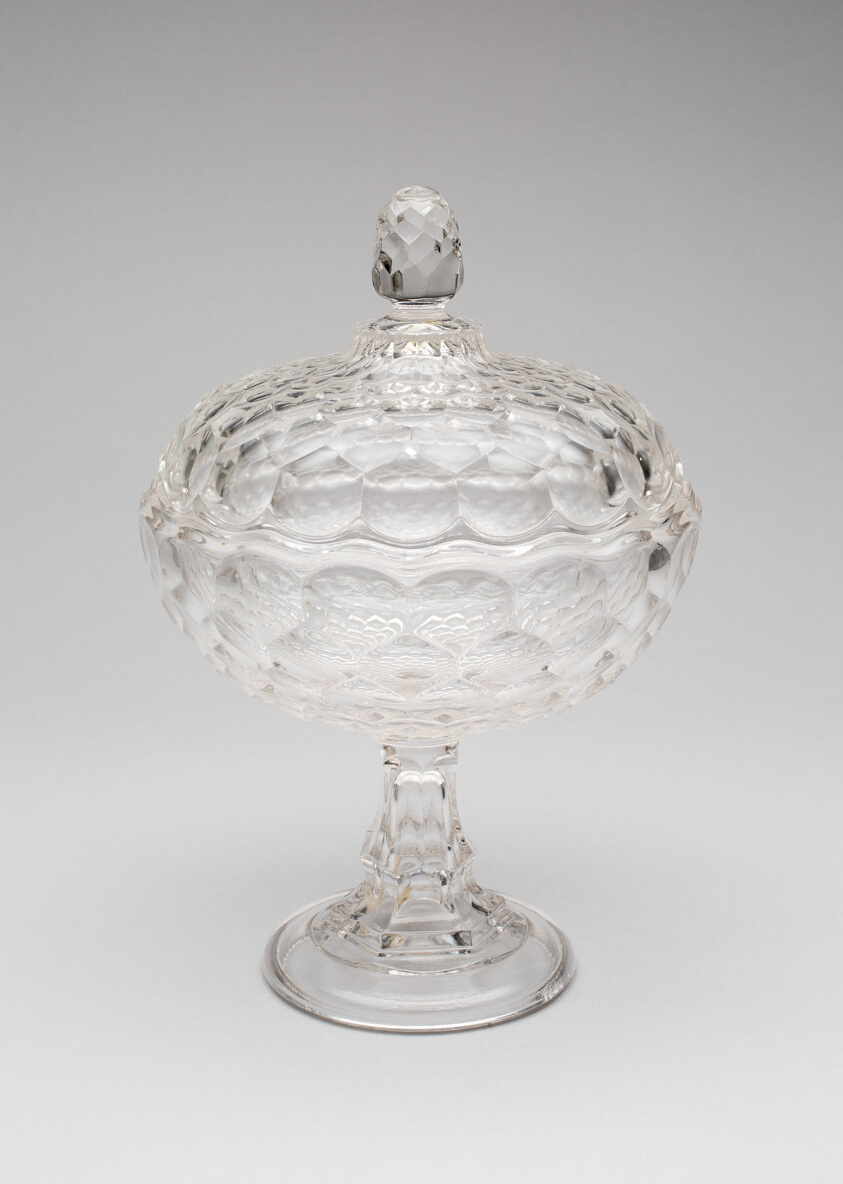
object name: Glass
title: Covered Compote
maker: Pittsburgh Glass Company (Pittsburgh)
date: c. 1850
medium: Pressed glass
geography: Pittsburgh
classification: compote; glass; vessel for serving food; american decorative arts; american arts; decorative arts